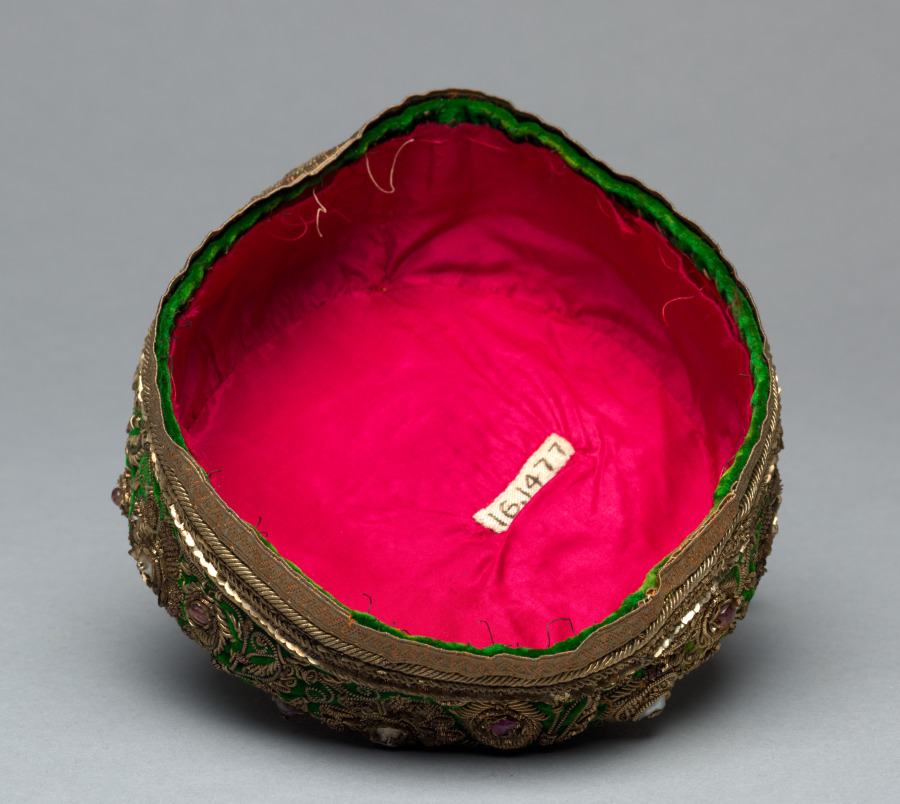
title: Cap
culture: India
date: 1800s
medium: Velvet embroidered with gilt-silver–wrapped silk thread (zari); silk: lining; rubies, pearls, and spinels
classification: Garment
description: Historically in India, head coverings were worn in outdoor and formal contexts and can signal age, allegiance, and status among Indian men and boys. A low round cap such as this was worn primarily by the well-educated aristocratic boys in the king’s circle. The painstaking process of creating the ornament involved wrapping gilt-silver wire of various dimensions around a silk thread core to create a textured appearance for the flowers and vines.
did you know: The semiprecious rose-colored spinels were considered a talisman for military victory.